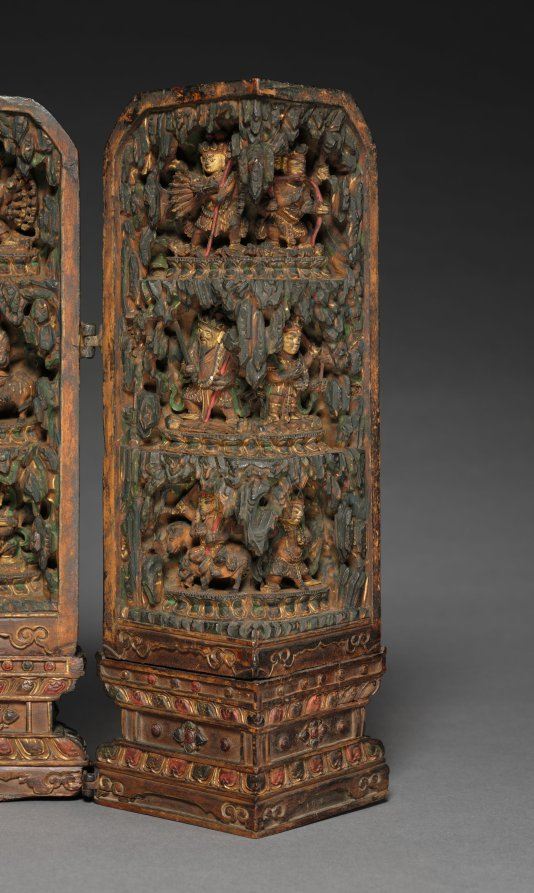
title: Portable Shrine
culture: Tibet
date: c. 1500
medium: wood with mineral pigments and metal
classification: Sculpture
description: Carved from a solid section of a log, the shrine contains images of protectors of tantric Buddhism—a branch that developed in northern India and became prominent in the Himalayas by the 700s. The central figure in the top row is Padmasambhava (Indian, active in Tibet in the 740s), venerated as the founder of one of the four main Tibetan monastic orders. Incised on the exterior are images of protectors, mantras written in Tibetan script, and a sacred funerary monument called a stupa. Tantric practice emphasizes recitation of mantras that invoke the powers of compassion, wisdom, and protection.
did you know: Tantric practice can be performed alone in any location; this shrine could be used by a traveling practitioner for meditation, visualization, prayer, and recitation of mantras.